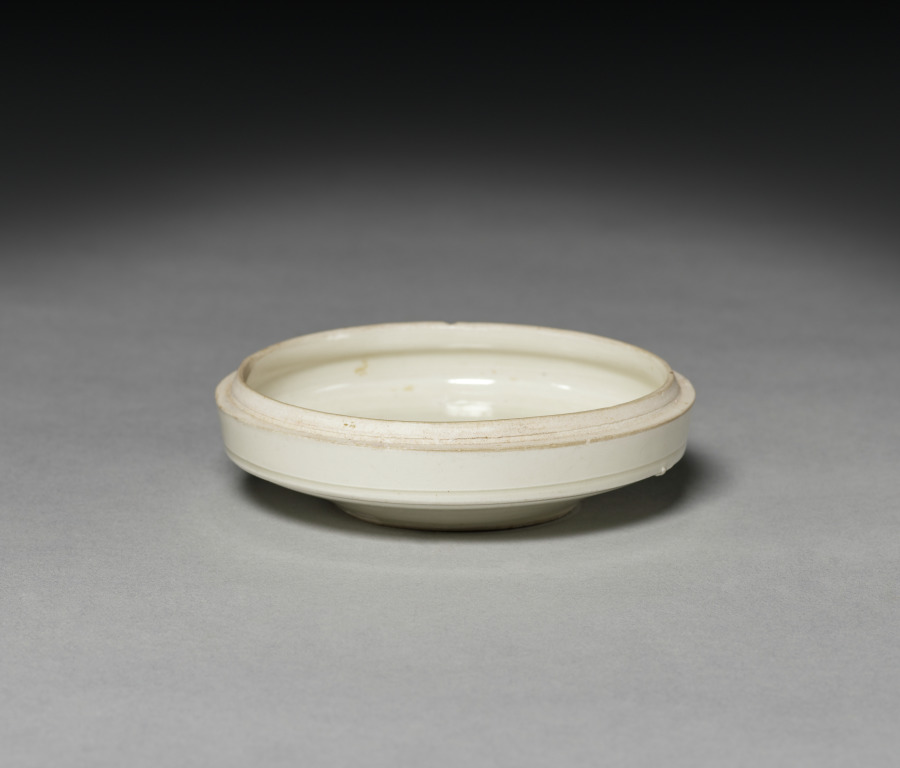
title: Covered Box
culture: China, Hebei province, Quyang, Northern Song dynasty (960-1127) to Jin dynasty (1115-1234)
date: 1100s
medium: cream-glazed porcelain with incised decoration, Ding ware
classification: Ceramic